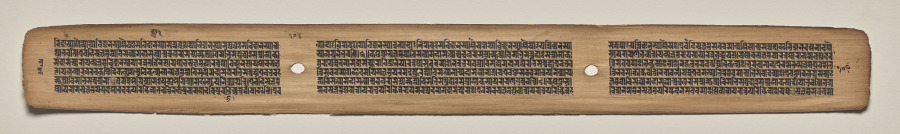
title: Text, Folio 104 (verso), from a Manuscript of the Perfection of Wisdom in Eight Thousand Lines (Ashtasahasrika Prajnaparamita-sutra)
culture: Eastern India, Bihar, Vikramashila Monastery. Painting: Nepal, Kathmandu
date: Sunday, September 14, 1119 (year 239 of the Newar Samvat in the month of Ashvina)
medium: gum tempera and ink on palm leaves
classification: Painting